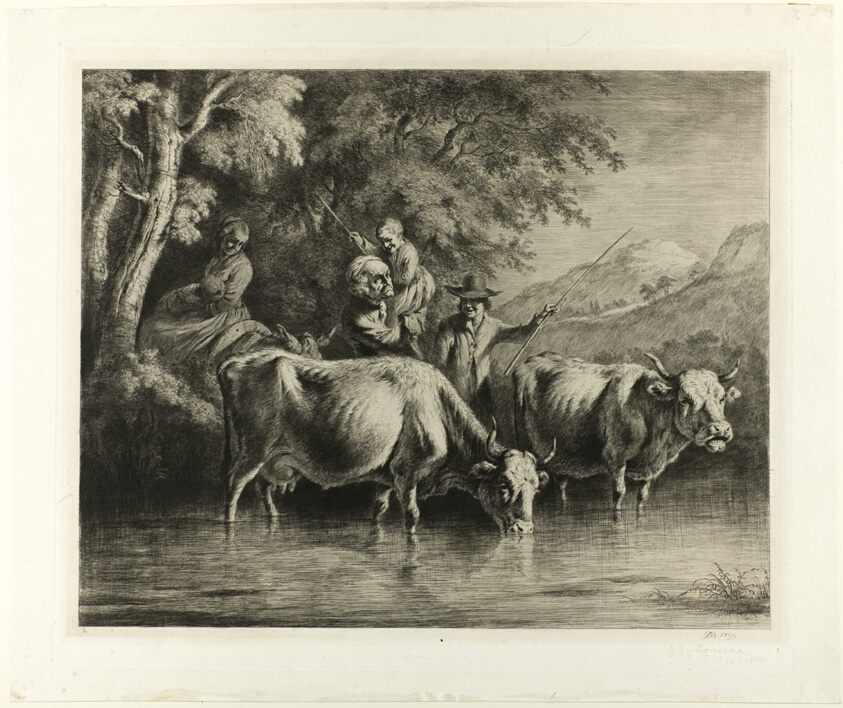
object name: Print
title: Cattle and Peasants Fording a Stream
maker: Jean Jacques de Boissieu (French, 1736-1810)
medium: Etching and engraving on paper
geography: France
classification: etching; print; prints and drawing